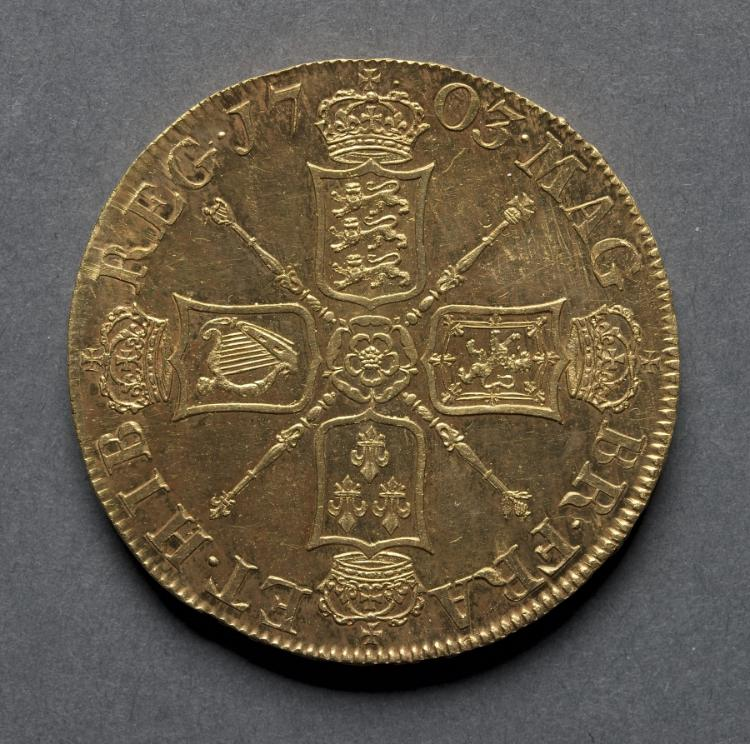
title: Five Guineas: Shields and Rose (reverse)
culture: England, Anne, 1702-1714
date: 1703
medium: gold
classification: Coins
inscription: MAG . BR . FRA . ET . HIB . REG . 1703 .